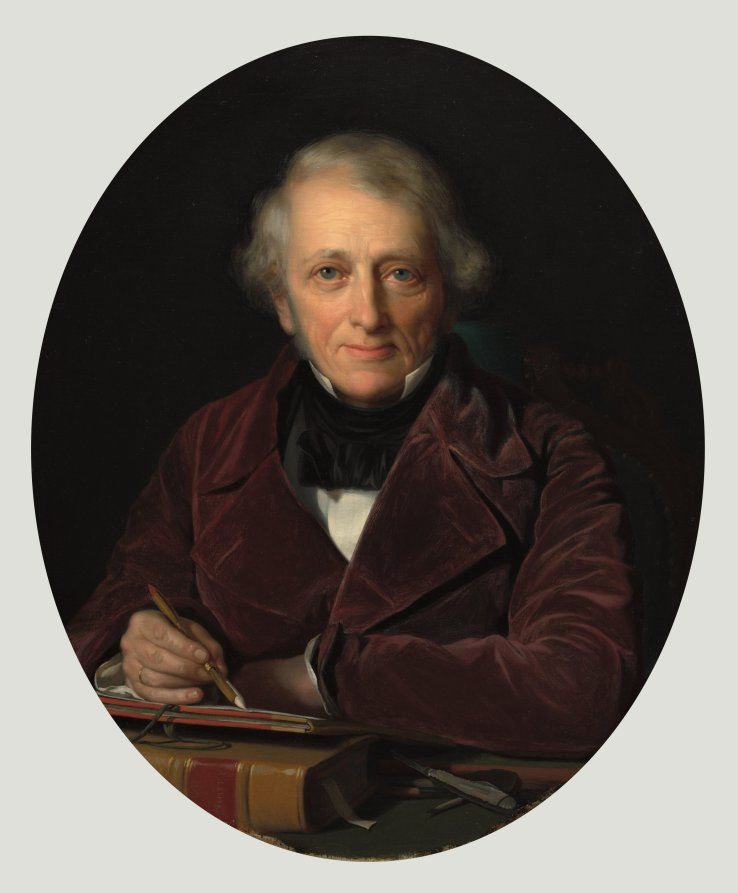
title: Leo Lehmann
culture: Germany, 19th century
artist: Rudolf Lehmann (German, 1819–1905)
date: 1851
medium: oil on fabric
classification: Painting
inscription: Signed lower center on spine of book in light-brown paint: r. lehman- [h and m attached] / 1851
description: This portrait portrays the artist's father, himself a painter and printmaker who gave his son his earliest artistic training. Fittingly, Lehmann depicted his father at work, surrounded by the tools of his trade. Resting his arms upon a sheet of paper supported by a book and a portfolio, Leo Lehmann holds a portecrayon, a penlike holder for the 19th-century equivalent of modern wax crayons. His intense gaze and his poised drawing implement suggest that he may be recording the likeness of his son, who at the same time paints his father's portrait. Lehmann was a successful portrait painter, especially among the English aristocracy, during the latter half of the 19th century. His popularity resulted not only from his remarkable ability to reproduce the appearance of surfaces—like his father's velvet coat—but also his capacity to capture the psychological presence of his sitters.